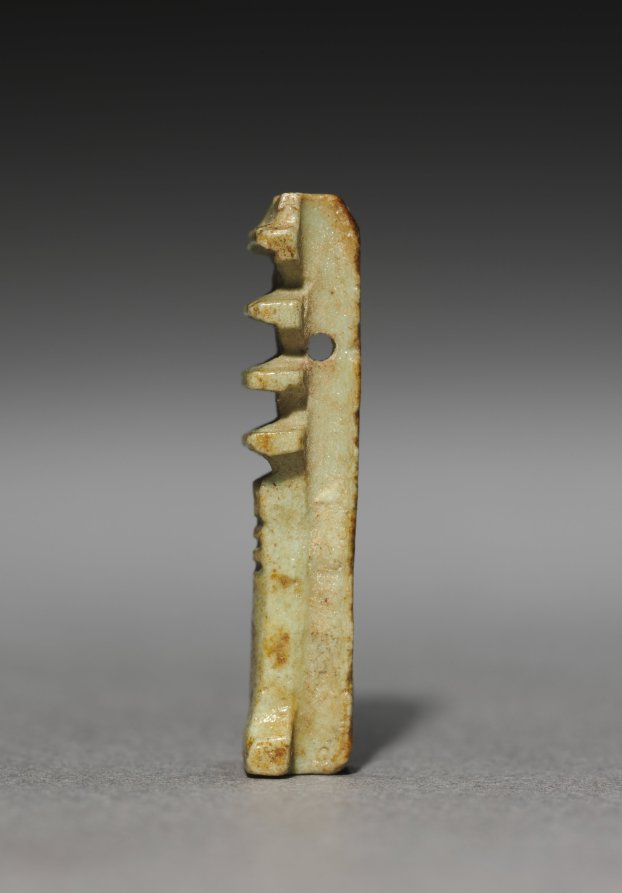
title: Pair of Djed-Pillar Amulets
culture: Egypt, Late period (715–332 BCE), Dynasty 30–Greco-Roman period (332 BCE–395 CE), Ptolemaic dynasty (305–30 BCE)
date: 380–30 BCE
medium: gray-green faience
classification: Amulets